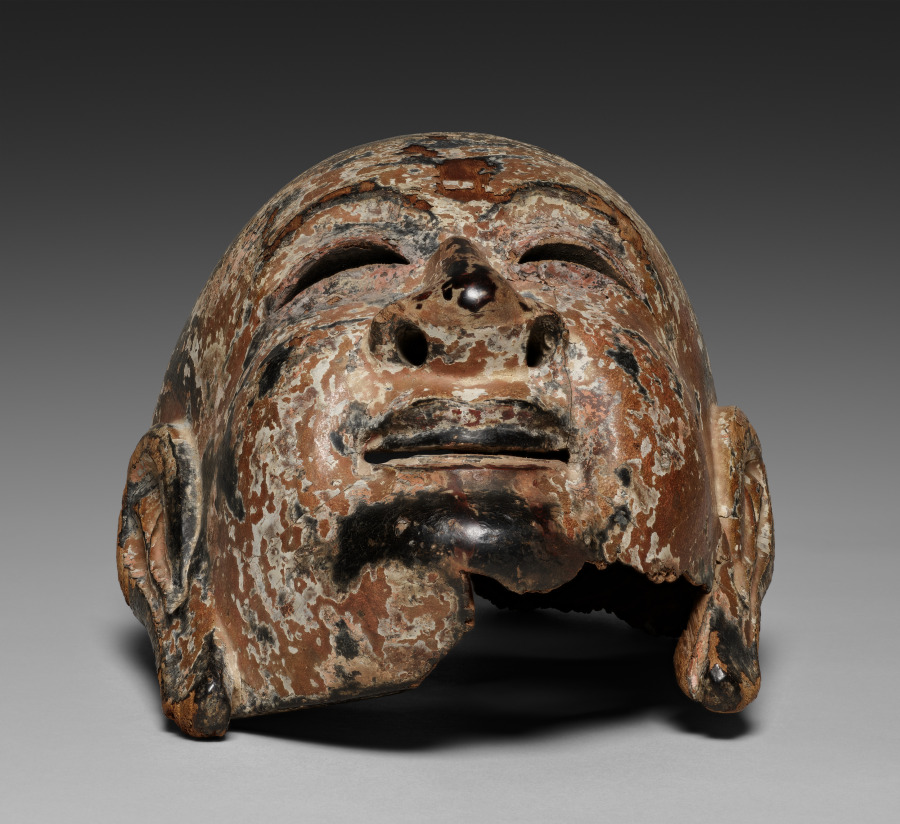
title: Gigaku Mask of Young Persian Boy (Taikōji)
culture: Japan, Nara period (710–94)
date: 710–94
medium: paulownia wood, lacquered and painted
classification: Sculpture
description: This mask is for the role of the son of an old Persian widower in gigaku, a theatrical dance repertoire imported to Japan from continental Asia during the seventh century. The old man and his sons mime prayers to the Buddha. While the mask would cover the entire head of the actor, there are openings for the eyes, nostrils, and mouth.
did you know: This is the mask for one of two sons who accompany a widower in ancient dance theater.